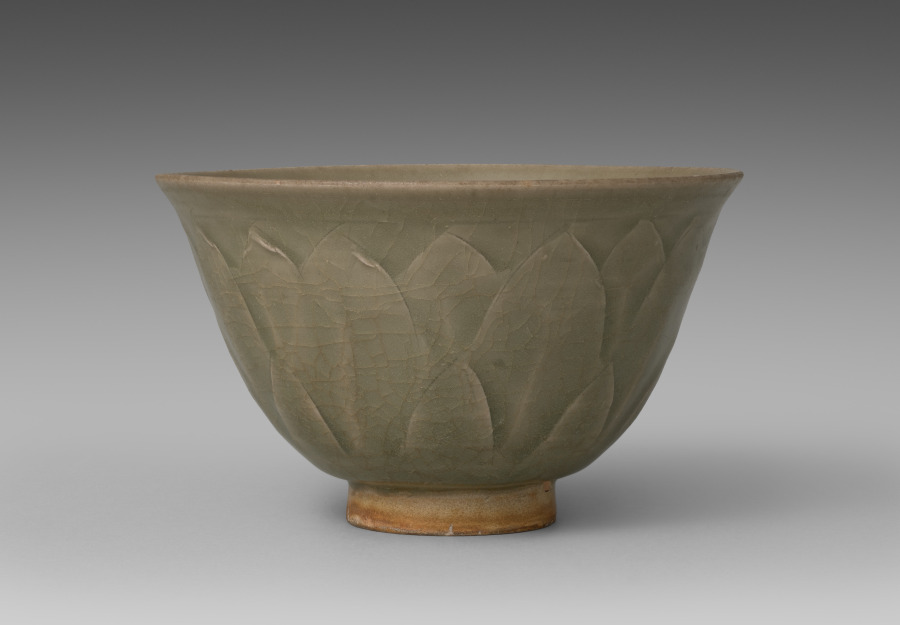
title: Bowl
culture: China, Northern Song dynasty (960–1127)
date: 1000s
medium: glazed stoneware; Northern Celadon ware, Yaozhou type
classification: Ceramic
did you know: Overlapping lotus petals cover the exterior walls of this deep bowl.